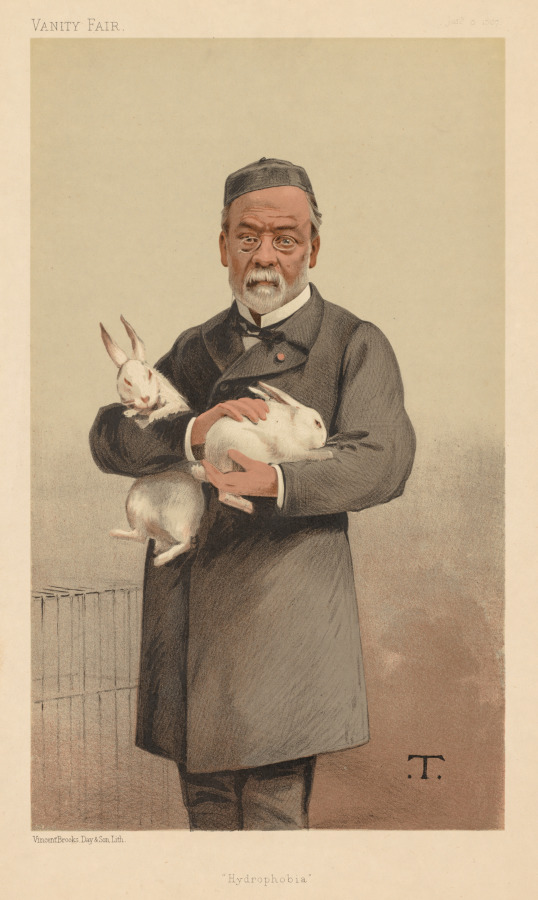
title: Vanity Fair: "Hydrophobia"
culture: France, 19th century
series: published in Vanity Fair Jan 8, 1887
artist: Théobald Chartran (French, 1849–1907)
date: 1887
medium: color lithograph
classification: Print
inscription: artist monogram, "T" in stone On mat: Louis Pasteur